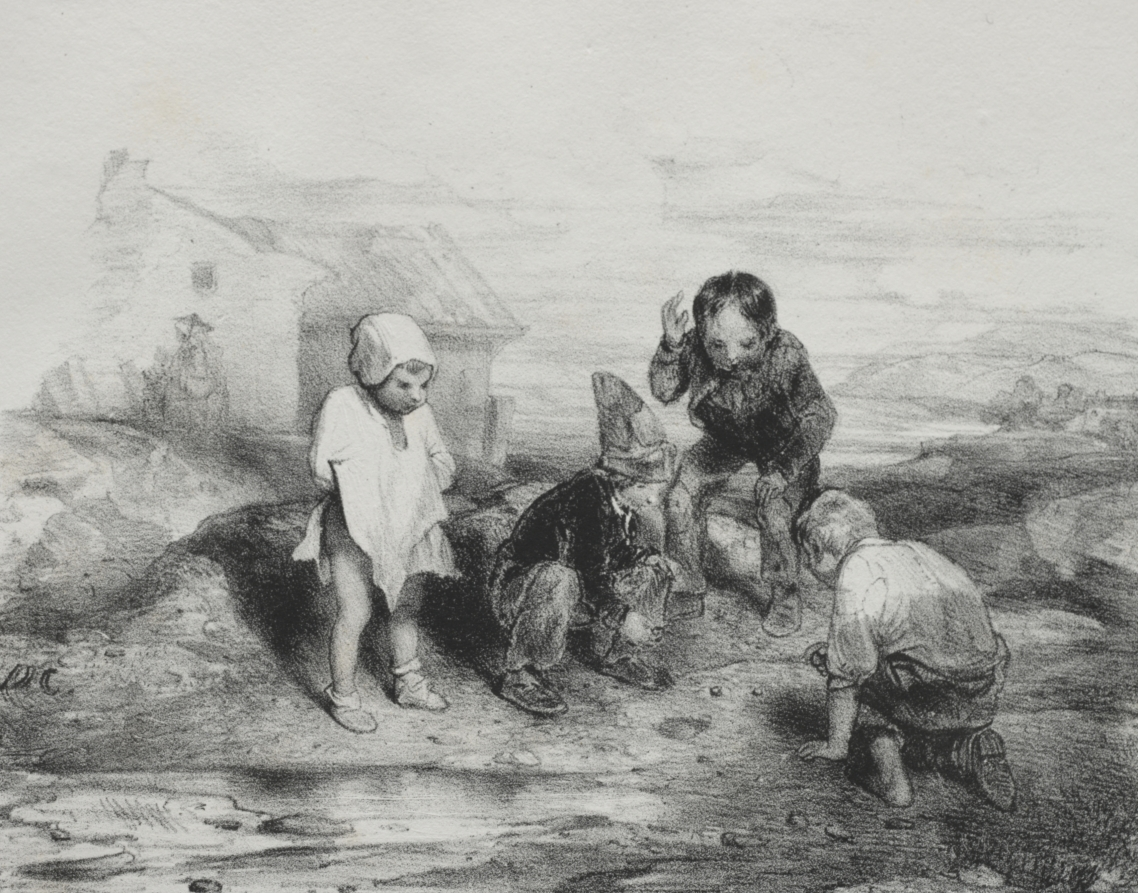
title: The Deciding Throw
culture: France, 19th century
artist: Alexandre-Gabriel Decamps (French, 1803–1860)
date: c. 1820–60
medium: lithograph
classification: Print